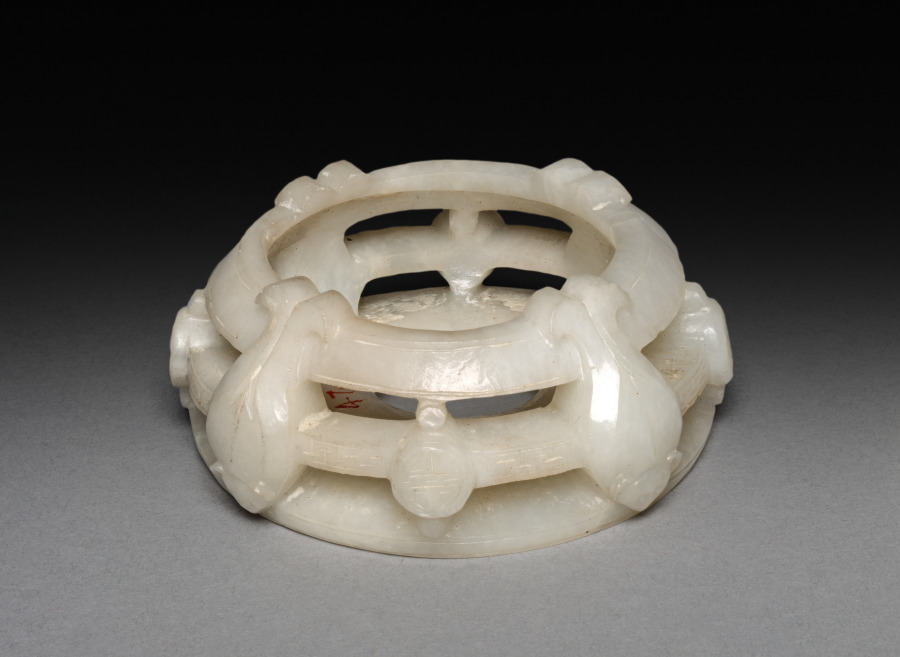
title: Three-Sectional Altar Group: Small Bowl with Carved Dragon (bottom section of base)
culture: China, Qing dynasty (1644-1911)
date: 1644–1911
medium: jade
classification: Jade